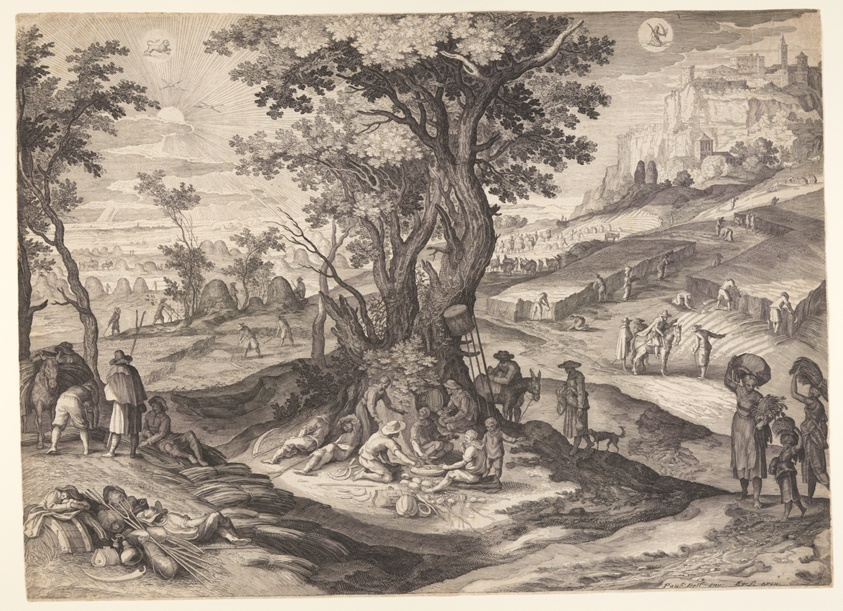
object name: Print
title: July/August, from The Twelve Months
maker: Aegidius Sadeler II (Flemish, c. 1570–1629); after Paul Bril (Flemish, 1554–1626)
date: c. 1615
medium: Engraving on ivory laid paper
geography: Flanders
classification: engraving; paper; print; prints and drawing